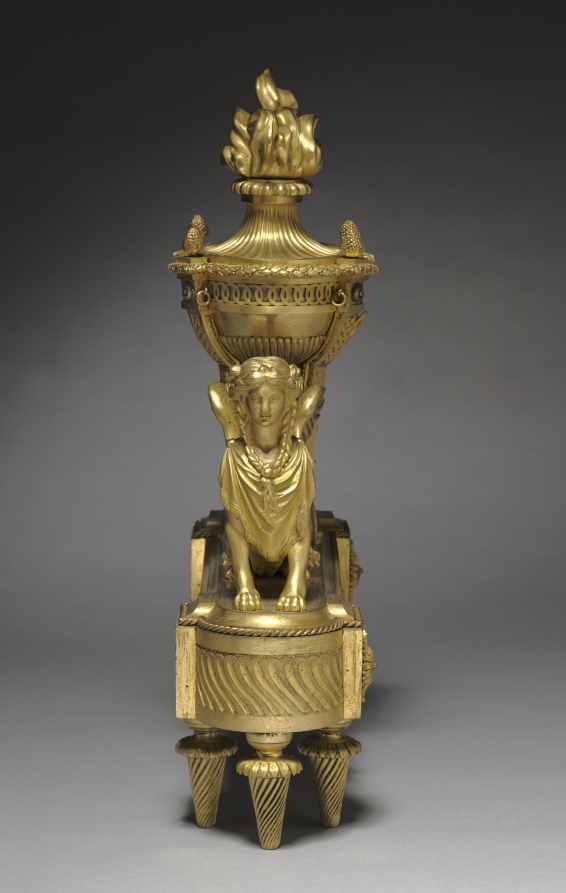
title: Firedog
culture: France, 18th century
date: c. 1785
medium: gilt bronze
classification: Furniture and woodwork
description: Although Louis Jean Desprez’s design was largely inspired by tombs in southern Italy, he added sphinxes in his print Tomb with Sphinx due to his fascination with ancient Egypt. Ancient Egyptians saw the sphinx, a half-human, half-lion mythological creature, as a protector of tombs and temples. The pair of andirons, decorative supports for a hearth’s firewood, alongside Tomb with Sphinx, highlight the growing interest in Egyptomania during the 1700s. Interestingly, the andirons portray ancient Greek and Roman interpretations of the sphinx. Most Europeans learned of ancient Egypt by studying Egyptomania in ancient Roman and Greek art and architecture or Egyptian antiquities brought over by the Romans.